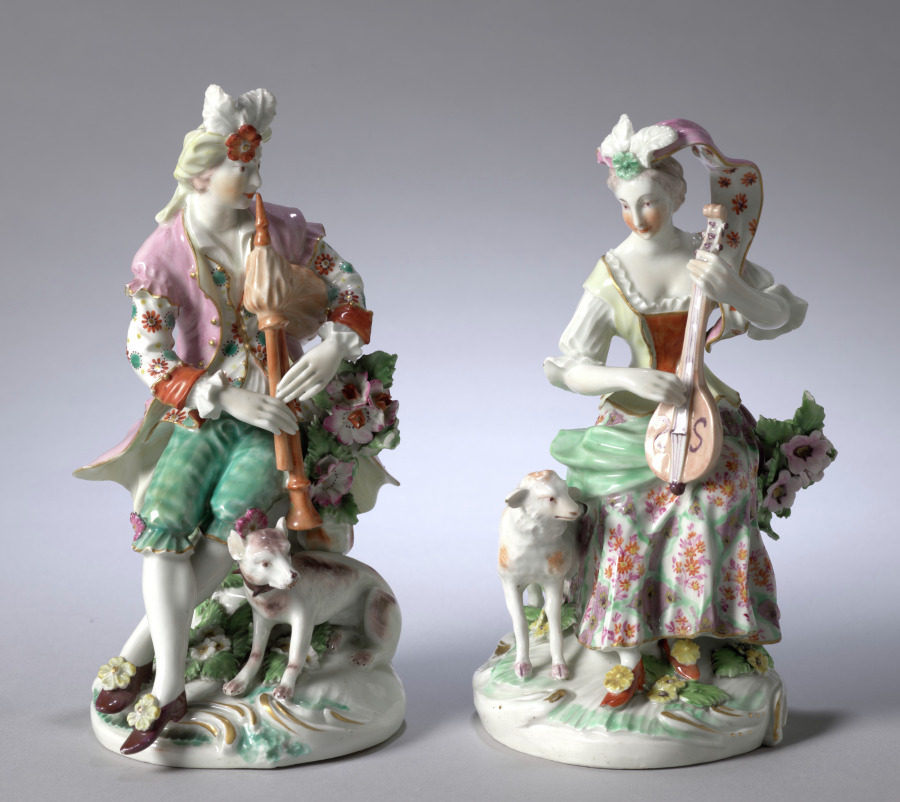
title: Seated Musicians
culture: England, Derby, 18th century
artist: Derby Porcelain Factory (British)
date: c. 1765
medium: soft-paste porcelain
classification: Ceramic